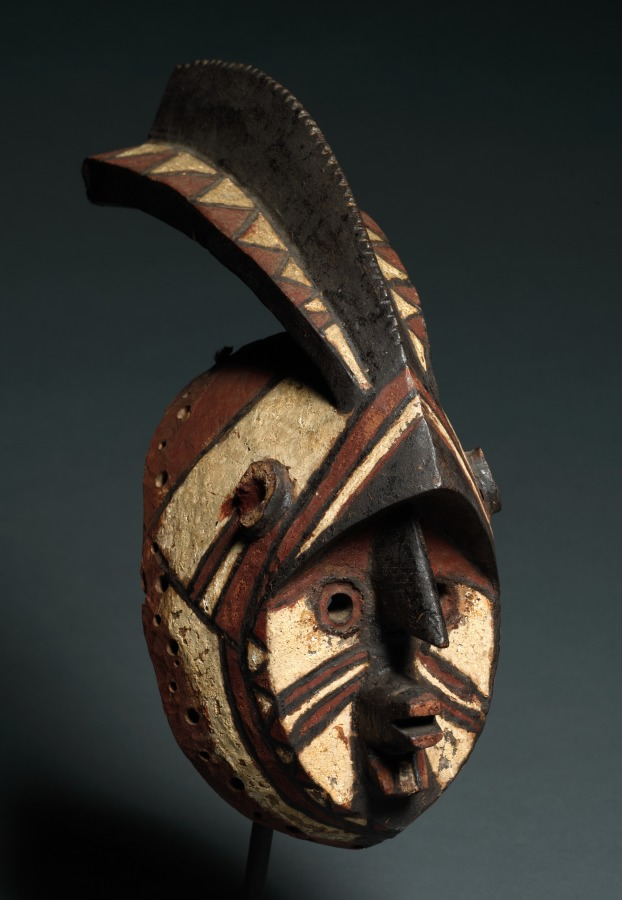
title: Mask (wan-balinga)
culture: Africa, West Africa, Burkina Faso, Mossi-style blacksmith-carver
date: early 1900s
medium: Wood and paint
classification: Mask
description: Only the farmers among the Mossi people employ masks. This mask’s proper name, wan-balinga, evokes a mythical figure who was the mother of the first Mossi ruler. Such masks are most typically worn and danced with on the occasion of the funeral of a male or female elder as escorts of the corpse to the grave. They also appear during annual memorial services that occur months after the actual burial, when all the deceased clan members are commemorated and honored.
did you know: This mask was worn and danced upon the death of an elder, escorting the corpse to the grave.